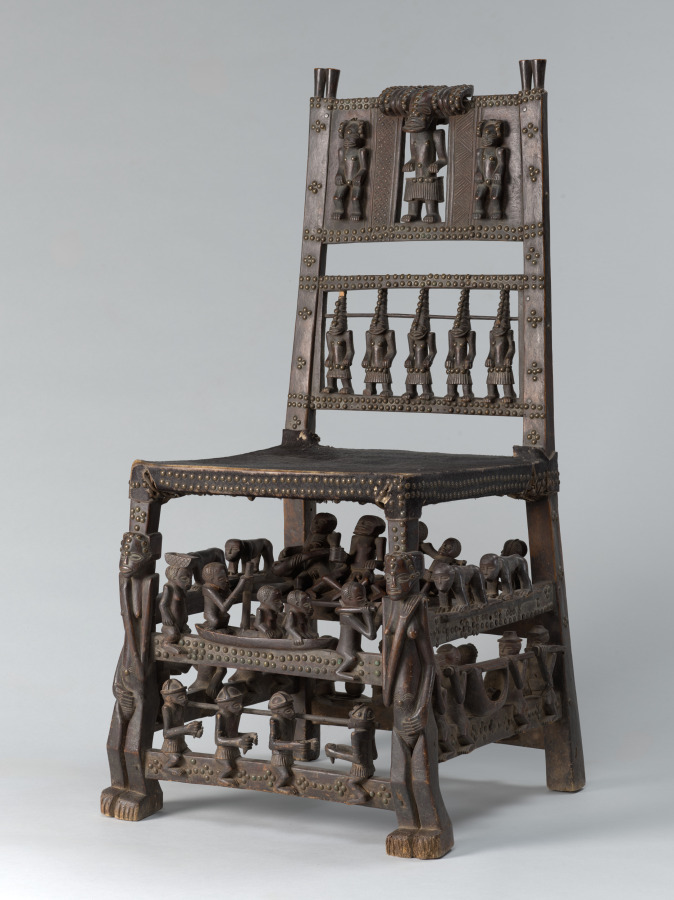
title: Ceremonial Chair or Throne (citwamo ca mangu)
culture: Africa, Central Africa, Angola, Chokwe-style carver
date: 1800s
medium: Wood, upholstery studs, leather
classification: Furniture and woodwork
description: This citwamo ca mangu chair bears over 40 sculpted figures arranged in complex compositions across the chair’s top rail (back), stretchers (rungs), and legs; all symbolize the power of Chokwe supreme chiefs. Such chairs typically bear a dozen or fewer figures. Scenes of royal life and power wrap around the seat, reinforcing how the chief and his family are at the center of their polity and its business.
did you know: Starting around the 1500s, Chokwe and other African leaders and traders received fine chairs as gifts from Portuguese traders. Chokwe leaders adapted this symbol of power as their own, using it in tandem with stools, an earlier kind of prestige seat.